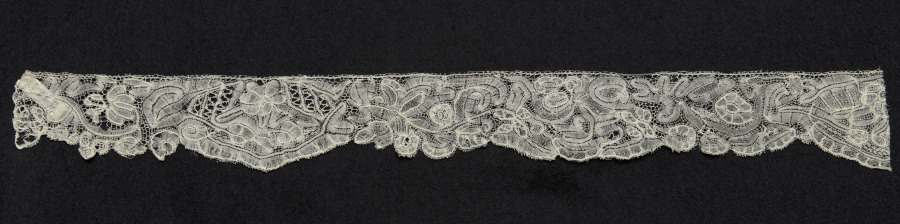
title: Lace Edging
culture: Belgium, Brussels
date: 1700s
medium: Bobbin lace (Point d'Angleterre)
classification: Lace